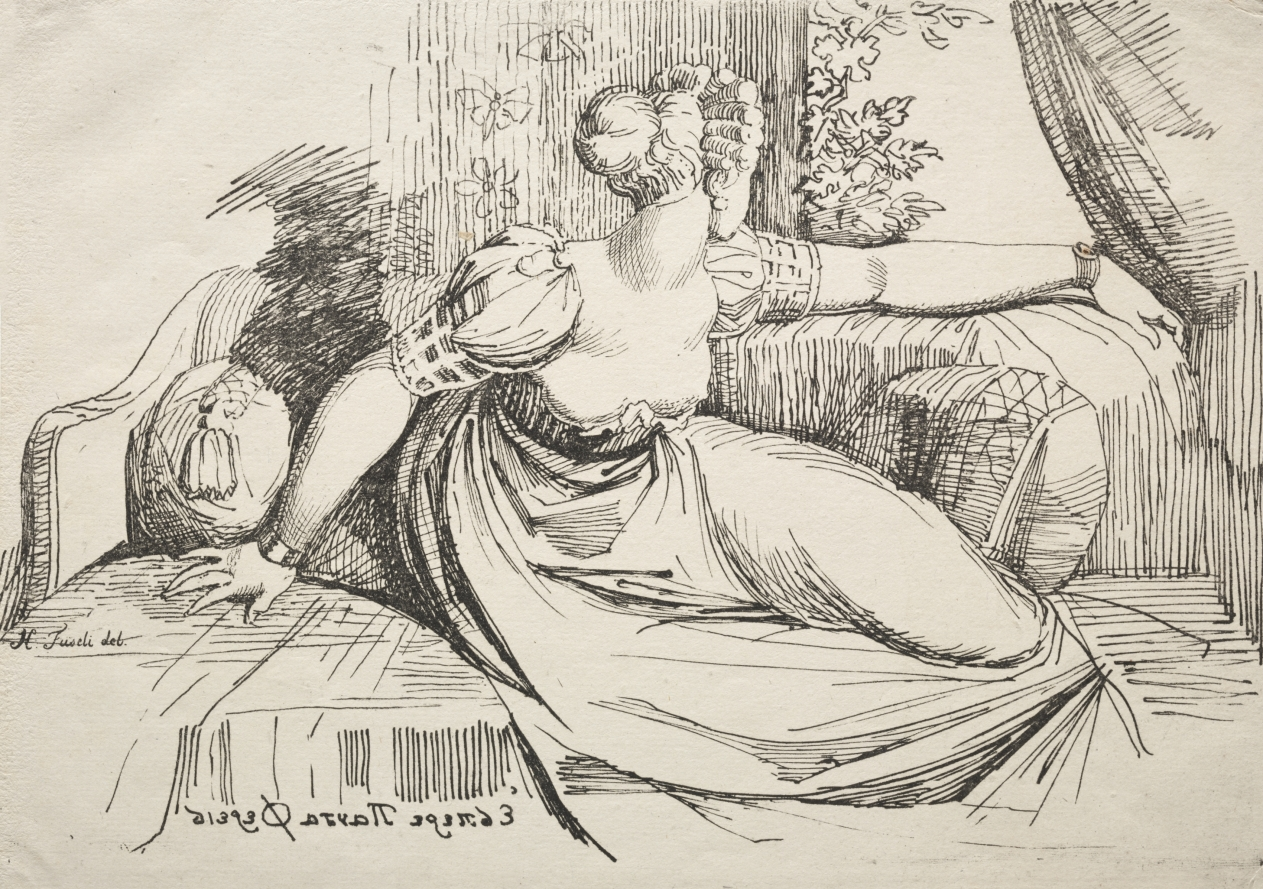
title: Evening Thou Bringest All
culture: England, 18th-19th century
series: Specimens of Polyautography Consisting of Impressions taken from Original Drawings made purposely for this Work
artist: Henry Fuseli (Swiss, 1741–1825)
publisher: Philipp H. André (German, active London 1800–1805)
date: 1803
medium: Pen lithograph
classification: Print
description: Here, the free expression of the artist’s drawn lines echoes the frenzied movement of his hand and the excited energy of the woman’s twisting body. While the immediacy of the mark marking suggests direct contact between the paper and the artist’s pen, the reversal of the Greek text at lower left exposes this work as a printed image, breaking the illusion. Created using lithography, a newly invented medium, the artist drew his composition on a specially prepared limestone. The stone was then inked and printed, reversing the image in the process.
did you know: The title of this print is drawn from a poem by the classical poet Sappho.